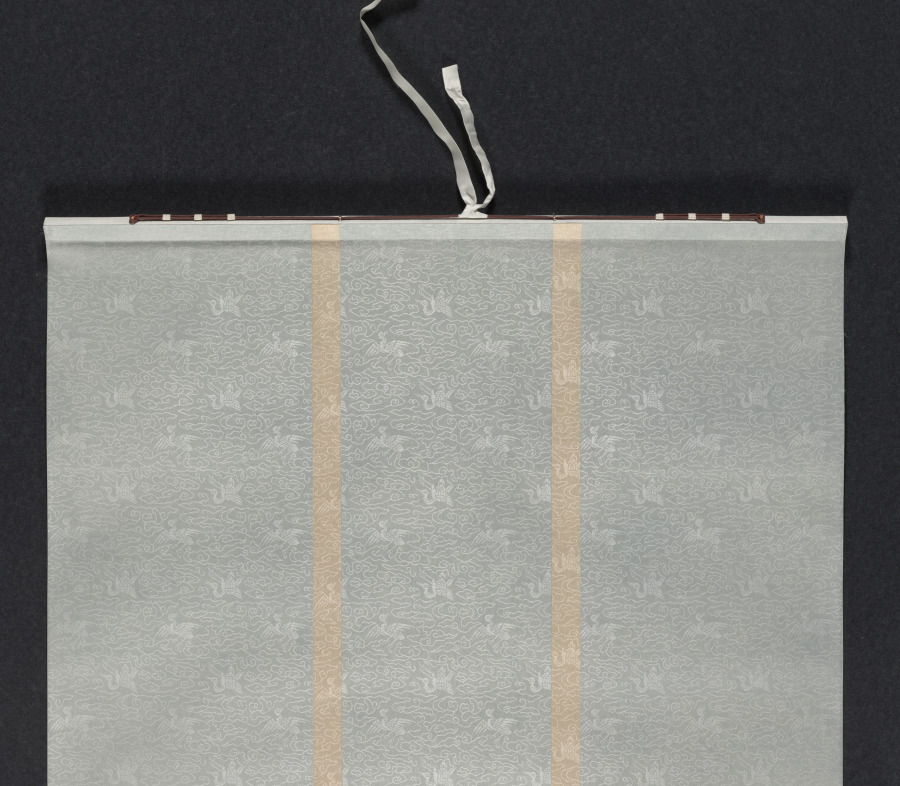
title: Bamboo in the Wind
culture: China, Yuan dynasty (1271-1368)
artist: Puming (Xuechuang) (Chinese, active before 1274-after 1329)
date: 1300s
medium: Hanging scroll; ink on silk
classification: Painting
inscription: Artist's signature and 2 seals, all reading: Xuechuang 雪窓.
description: Bamboo is an evergreen plant that does not break under the weight of snow or the force of the wind, and thus became a favorite motif in literati painting and Chan Buddhism as a metaphor for the virtue of not yielding to worldly temptations. Xuechuang, also known as monk Puming, was a native of Songjiang, near Shanghai, who spent his life as a monk in Suzhou. In 1338, he presided over Yunyan temple on Tiger Hill. Here, he masterfully depicts a bamboo gently bent in a subtle breeze. Puming’s paintings were revered in Japan and Korea.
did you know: Bamboo, pine, and plum, often referred to as the "three friends of winter," are popular motifs in Chinese literati art.